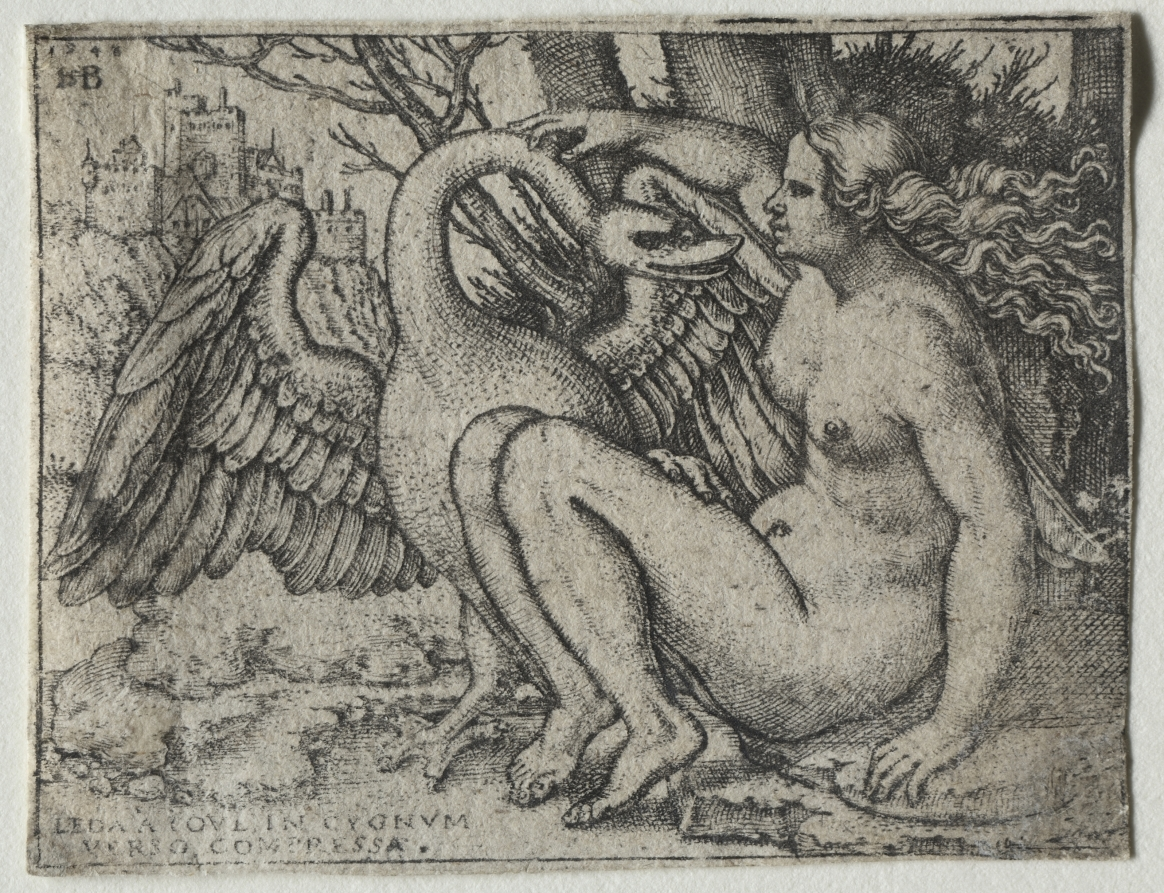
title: Leda and the Swan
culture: Germany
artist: Hans Sebald Beham (German, 1500–1550)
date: 1548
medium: engraving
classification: Print